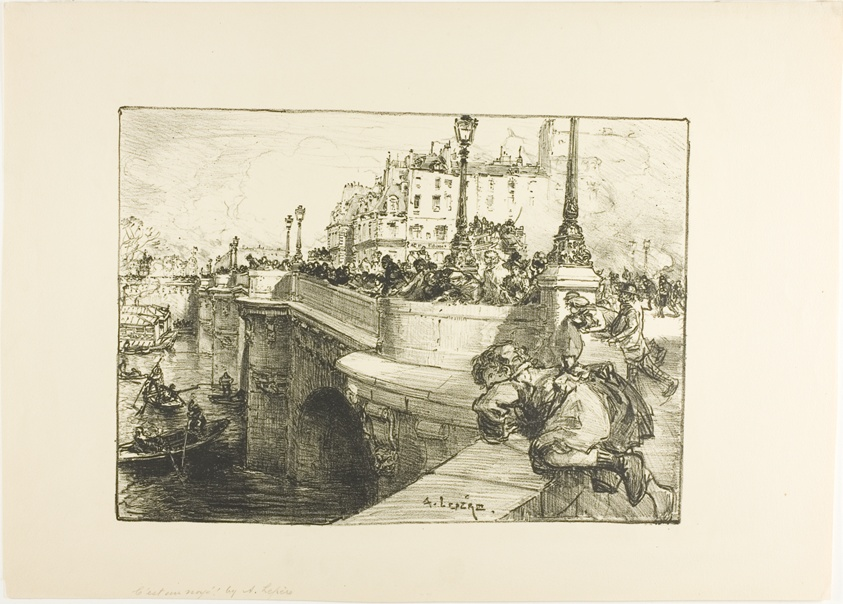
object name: Print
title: There's a Floating Corpse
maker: Louis Auguste Lepère (French, 1849-1918)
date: 1892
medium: Lithograph in black with scraping on stone on cream wove paper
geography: France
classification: lithograph; print; prints and drawing